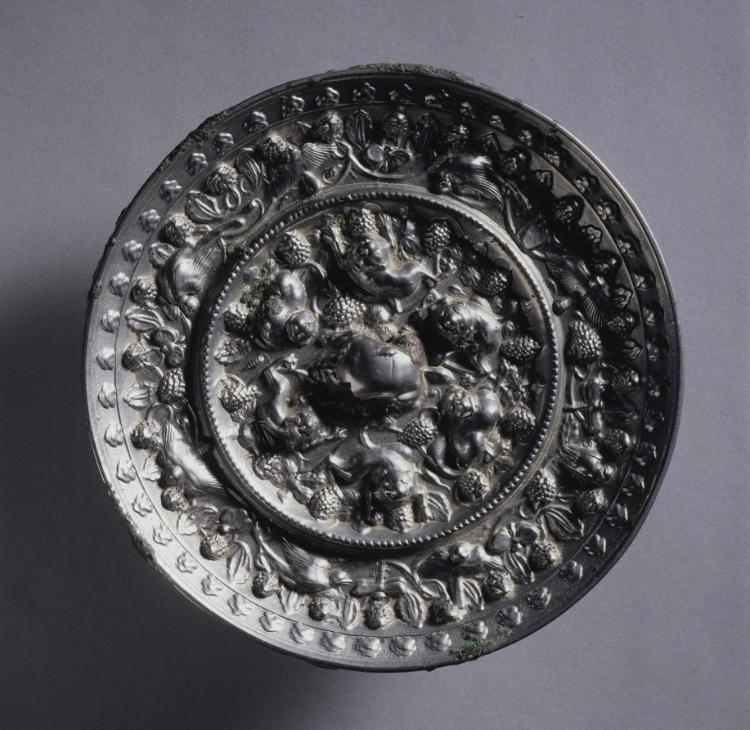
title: Animal-and-Grape Mirror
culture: China, Tang dynasty (618-907)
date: late 600s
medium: bronze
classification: Metalwork